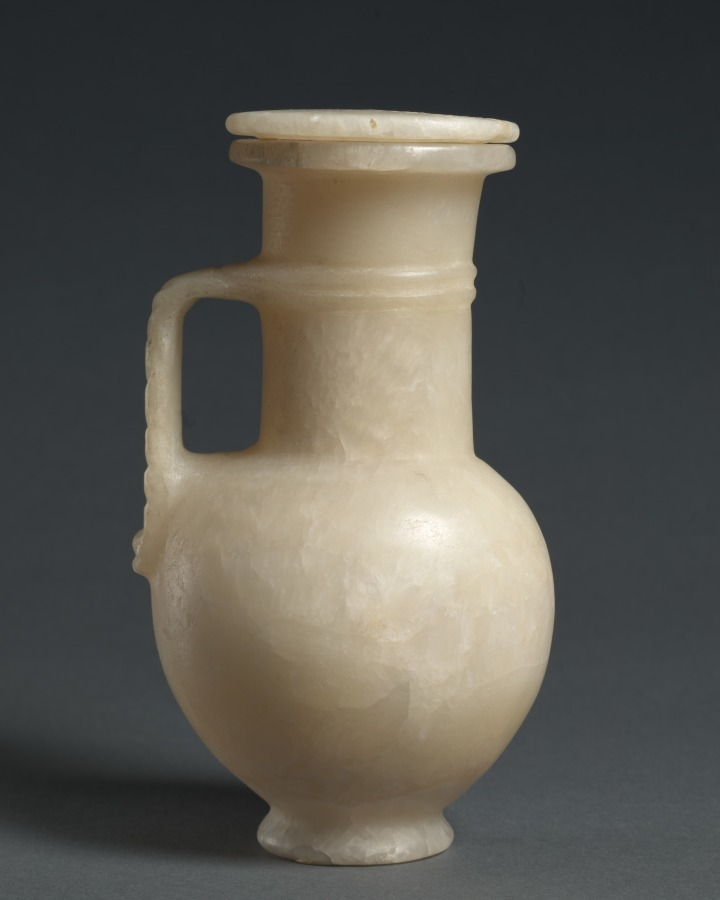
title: Long-Necked Flask with Strap Handle and Lid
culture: Egypt, New Kingdom (1540–1069 BCE), Dynasty 18, reign of Tuthmosis III (1479–1425 BCE)–reign of Amenhotep III (1390–1352 BCE)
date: 1401–1353 BCE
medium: travertine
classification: Vessels